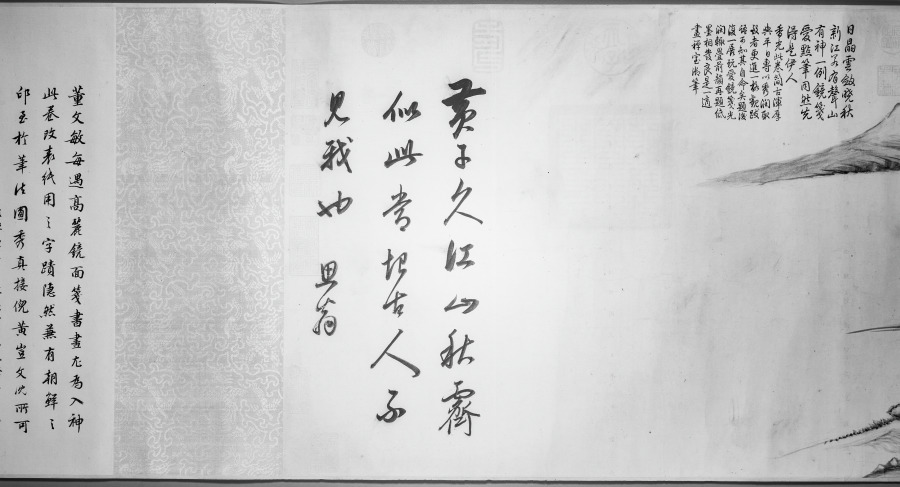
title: River and Mountains on a Clear Autumn Day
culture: China, Ming dynasty (1368–1644)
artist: Dong Qichang (Chinese, 1555–1636)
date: c. 1624–27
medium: Handscroll; ink on Korean paper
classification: Painting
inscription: 黃子久江山秋霽似此，當恨古人不見我也。思翁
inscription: 董文敏每遇高麗鏡面箋，書畫尤為入神。此卷改表紙用之，字跡隱然，兼有朝鮮之印。至於筆法圓秀，真接倪黃。豈文沈所可同日而語也。 康熙庚午中秋後一日，天氣澄爽，重裝初畢，跋於瓶廬。抱瓮翁高士奇。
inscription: Second inscription by Gao Shiqi 高士奇 (1645–1704): On the twenty-third day of the ninth month, the jiaxu year of the Kangxi era [1694], I packed my bags to head north. When my boat passed Wuchang [Suzhou], Mr. Mantang [Song Luo] brought wine to bid me farewell so that we could share our thoughts on our separation in the last few years. I showed him the paintings and calligraphy which I collected and asked his opinions. Since Mr. Mantang does not own any handscrolls by Wenmin [Dong Qichang], I leave this one for him in commemoration of our parting; thus the painting will have a worthy owner and our meeting will become a beautiful story in the future. It is the fourth day after the beginning of winter, with the sky clear and sober. Trees under frost have turned red and yellow, seemingly echoing the brush and ink in the painting. I also ask Mr. Mantang to inscribe a poem to commemorate our meeting so that it will survive forever.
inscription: 1 colophon and 4 seals of Song Luo 宋犖 (1634–1713): Who is the foremost art connoisseur of our dynasty?/ Tangcun [Liang Qingbiao, 1620–1691] is dead, so the title passes to Jiangcun [Gao Shiqi]./ Leaving office, you retired for five years in the Lake region./ Fondling handscrolls and hanging scrolls from morning to evening./ You sent me your collection catalogue Xiao Xia Lu last year;/ It is indeed the true equal of [Zhou Mi's] Yun Yan Guo Yan./ This year you returned to the capital by imperial order;/ Your boat with calligraphy and paintings anchored at the river bank in Suzhou./ When we met each other you did not waste any time for conversation by poured out immediately/ From your "coral net" extraordinary treasures./ You produced incomparable scrolls, with gold-inscribed labels and jade rollers,/ Pouring out from bags and trunks, they were spread in disarray./ Without a word, I rolled and unrolled until my fingers were numbed,/ We sat straight, facing each other quietly, and never felt tired./ For three days we forgot about sleeping and food./ And at times we shouted our joy out loud, forgetting who is host or guest./ Your Dwelling in the Fuchun Mountains and the Yuansheng manuscript/ These peerless works I myself examined with delight./ As an added pleasure to the farewell dinner under the Maple Bridge,/ You allowed me to hold again this handscroll by Dong Qichang--/ The Misty River and Piled Peaks [by Zhao Mengfu] and this Clear Autumn Day are two extraordinary masterpieces./ In showing such life and spirit with "qi yun." the artists were truly "men of heaven."/ The Clear Autumn Day is not even three feet long,/ Painted on tributary Korean paper, it shines like silver./ Every building up and every turn of the mountains imitates nature,/ Every tree and every rock is removed from the commonplace./ From the beginning, the theory of poetry is the theory of painting,/ Like the lotus and the morning sunshine, they complement and refresh each other./ The artist's inscription regrets that "the Old Masters cannot see my scroll."/ Huang Gongwang would have agreed in his grave./ The vermilion of the seals glitter and dazzles the eyes,/ These added accessories are as valuable as jade./ You are very kind to give it to me,/ The feelings expressed in your inscription are so sincere./ Wanting to refuse, but unable, I accept it to respect your wish,/ And taking off my gown and cap I wrapped it with care./ You asked me to write a long poem in commemoration of this beautiful occasion,/ I am too ashamed that my effort in response is so poor and inadequate./ Returning home, I unrolled it under candlelight, trying to write the colophon,/ The light of the waning moon shines at the foot of the mossy wall./ Earnestly humming and brows knit in deep thought, I try to compose;/ The verses are not outstanding, but the facts are real./ With this poem recorded at the end of the scroll, I mail it to you for approval,/ This poem and this painting shall outlast a thousand springs. (Translation by LYSL/HK/WKH)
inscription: 1 colophon and 2 seals of Shao Changheng 邵長蘅 (1637–1704); 2 inscriptions and 14 seals of the Qianlong 乾隆 emperor (r. 1736–95); 1 seal of the Jiaqing 嘉慶 emperor (r. 1796–1820); 3 seals of the Xuantong 宣統 emperor (r. 1908–11); 1 seal unidentified.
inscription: [印] 朝鮮國王之印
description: Dong Qichang had a tremendous impact on the artistic practices and historiography of later generations; his works and writings shaped literati aesthetics. Here, Dong places an abstract landscape composition diagonally across the picture plane, configured to recall earlier masters and simultaneously express his own personal style. Dong’s inscription claims, Huang Gongwang’s Autumn Day, looks like this. I truly regret the master has not seen my work. In fact, Dong Qichang may have had Dong Yuan’s Xiao and Xiang Rivers in mind, a work he owned and considered a key work in Chinese art history.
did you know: The painting has an imprint of a Korean seal that reads "Seal of the king of Joseon."